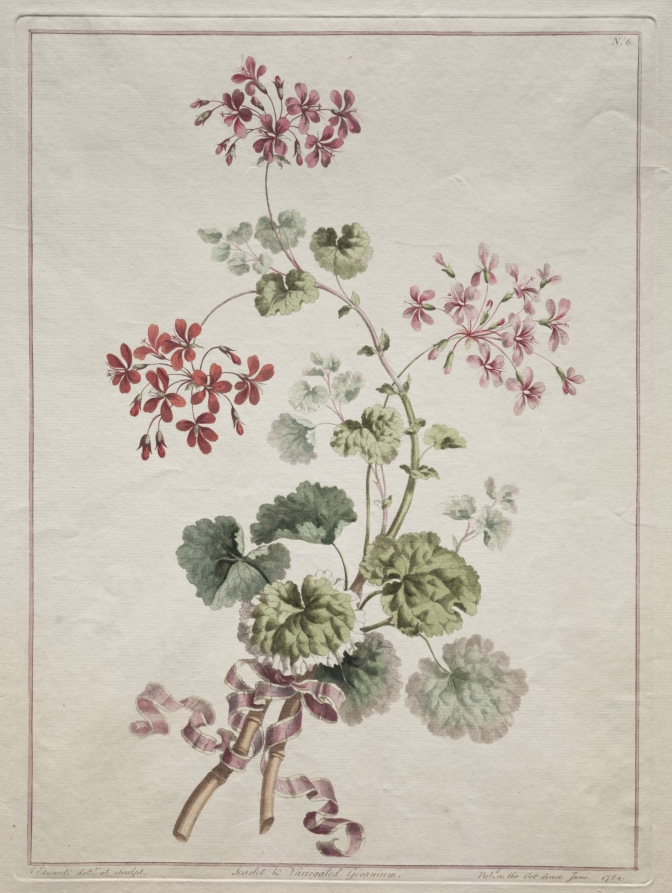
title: A Collection of Flowers Drawn from Nature: No. 6 - Scarlet and Variegated Geranium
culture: England, late18th-early 19th Century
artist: John Edwards (British)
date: 1801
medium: etching, hand colored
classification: Print